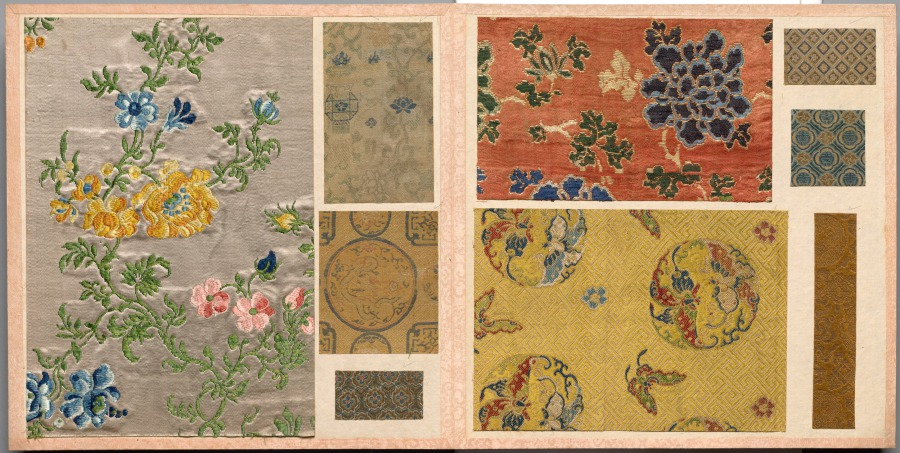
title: Album of Textile Samples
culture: Japan and China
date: 1700s–1800s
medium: silk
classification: Textile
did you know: This album contains 46 pages with 156 mounted Chinese or Japanese textile samples.